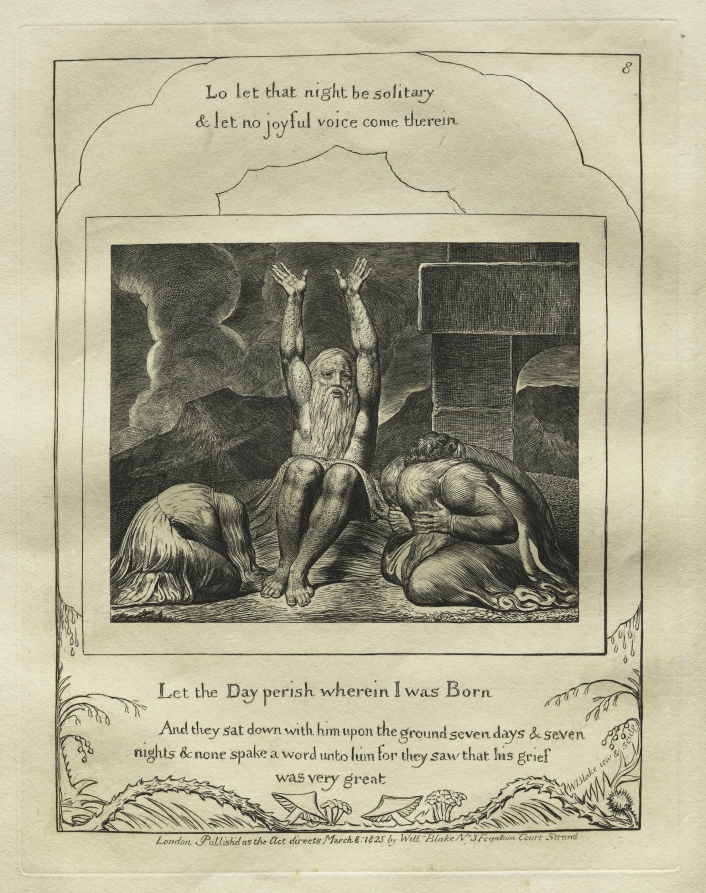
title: The Book of Job: Pl. 8, Let the Day perish wherein I was Born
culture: England, 19th century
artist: William Blake (British, 1757–1827)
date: 1825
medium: engraving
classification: Print